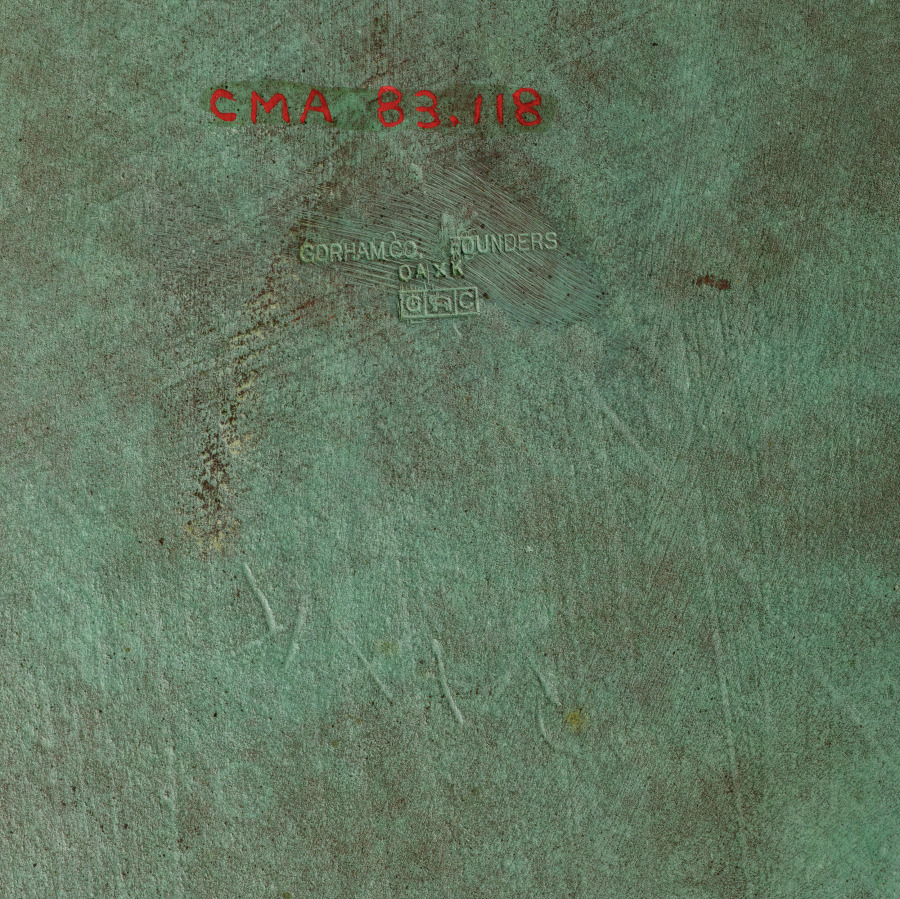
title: Basin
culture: America, New York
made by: Gorham Manufacturing Company (America, est. 1831)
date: early 1900s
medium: bronze, greenish black artificial patina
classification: Metalwork